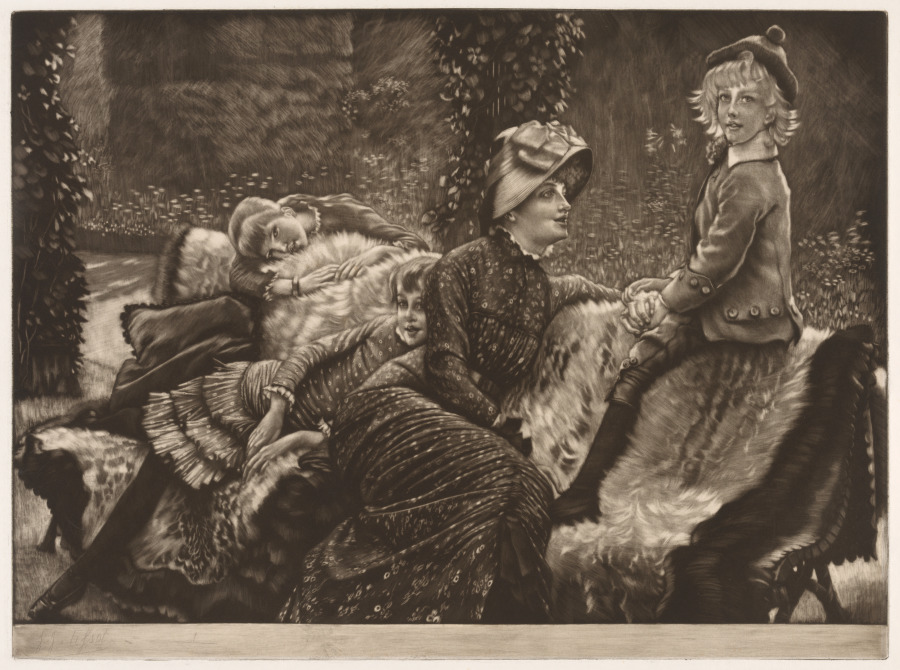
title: The Garden Bench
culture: France, 19th century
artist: James Tissot (French, 1836–1902)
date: 1883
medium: mezzotint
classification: Print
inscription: printed lower left: J. J. Tissot